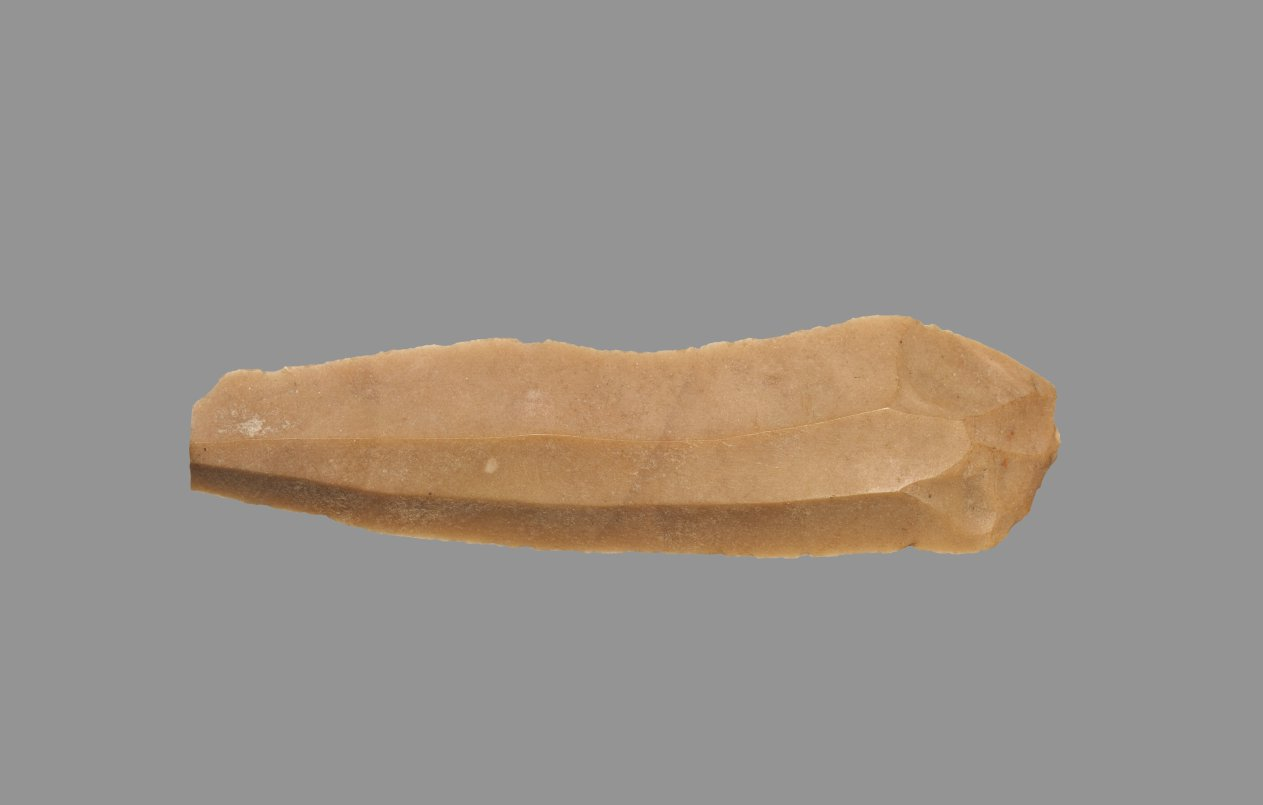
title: Sickle Blade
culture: Egypt, Middle Kingdom (2040–1648 BCE), Dynasty 12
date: 1980–1801 BCE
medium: flint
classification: Implements